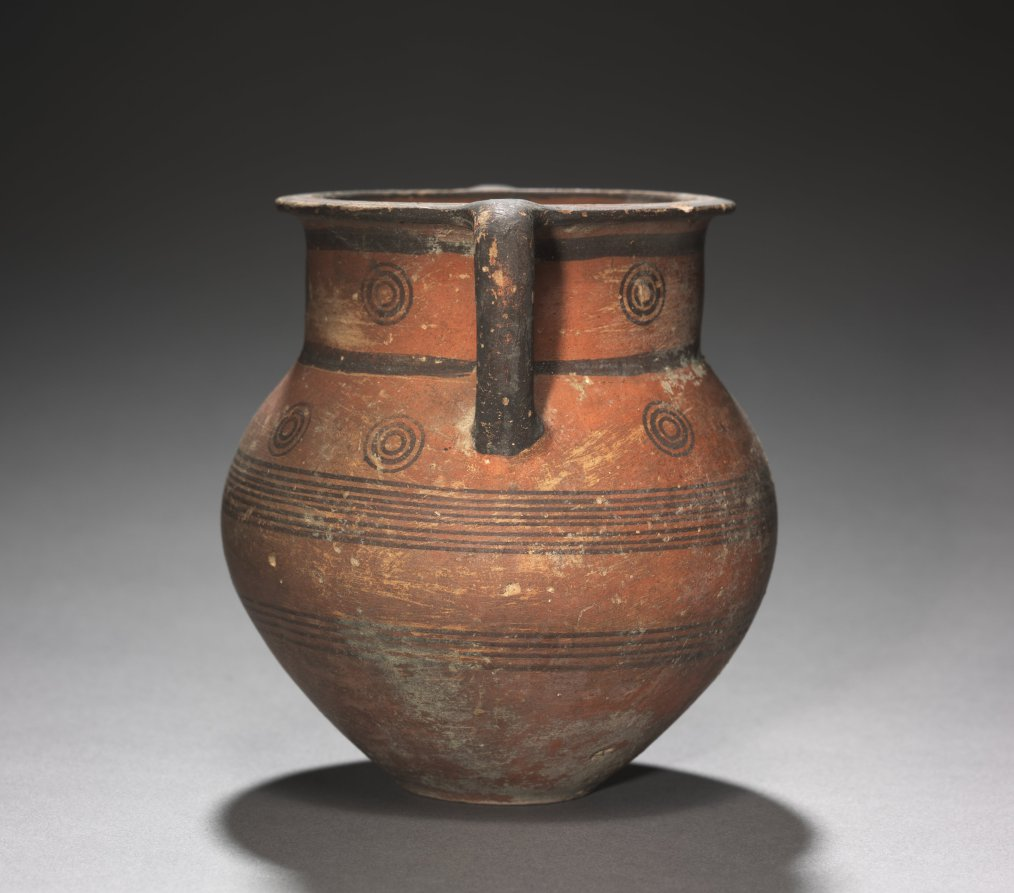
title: Amphora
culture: Cyprus, Cypro-Archaic I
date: c. 750–600 BCE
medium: red ware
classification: Ceramic